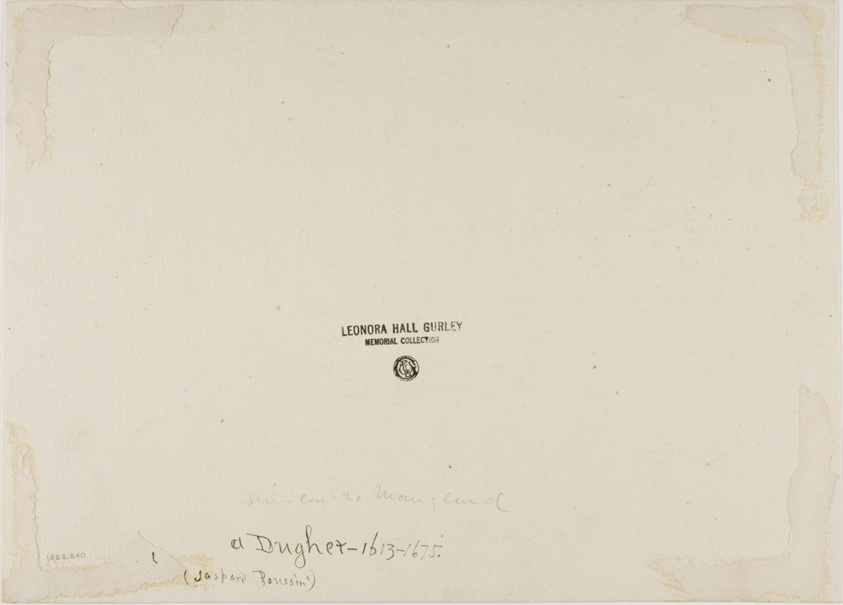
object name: Drawing and Watercolor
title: View of Harbor, with Figure and Vegetation in Foreground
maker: Style of Adrien Manglard (French, 1695-1760)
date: c. 1700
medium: Red chalk on ivory laid paper, laid down on cream laid paper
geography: France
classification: chalk; paper; drawings (visual works); prints and drawing